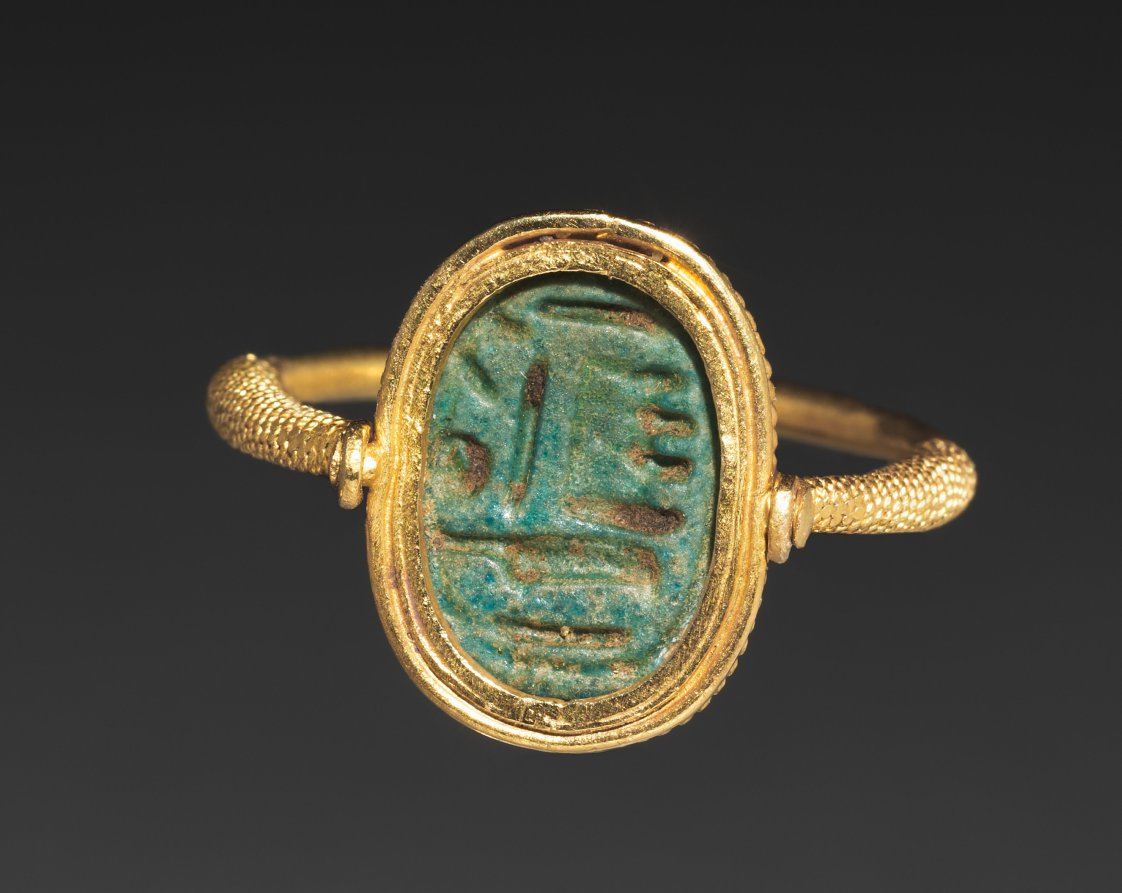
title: Scarab Ring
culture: Egypt, New Kingdom (1540–1069 BCE)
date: 1540–1069 BCE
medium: turquoise faience (mounted on swivel bezel in modern gold ring)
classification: Scarabs